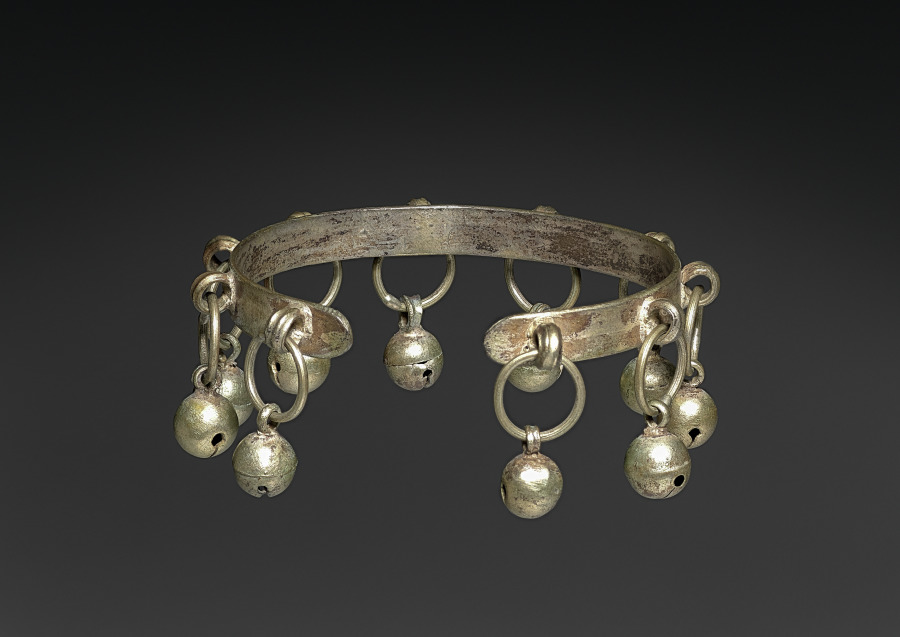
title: Wristlet or Anklet for Children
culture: India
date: early 1900s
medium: silver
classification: Jewelry